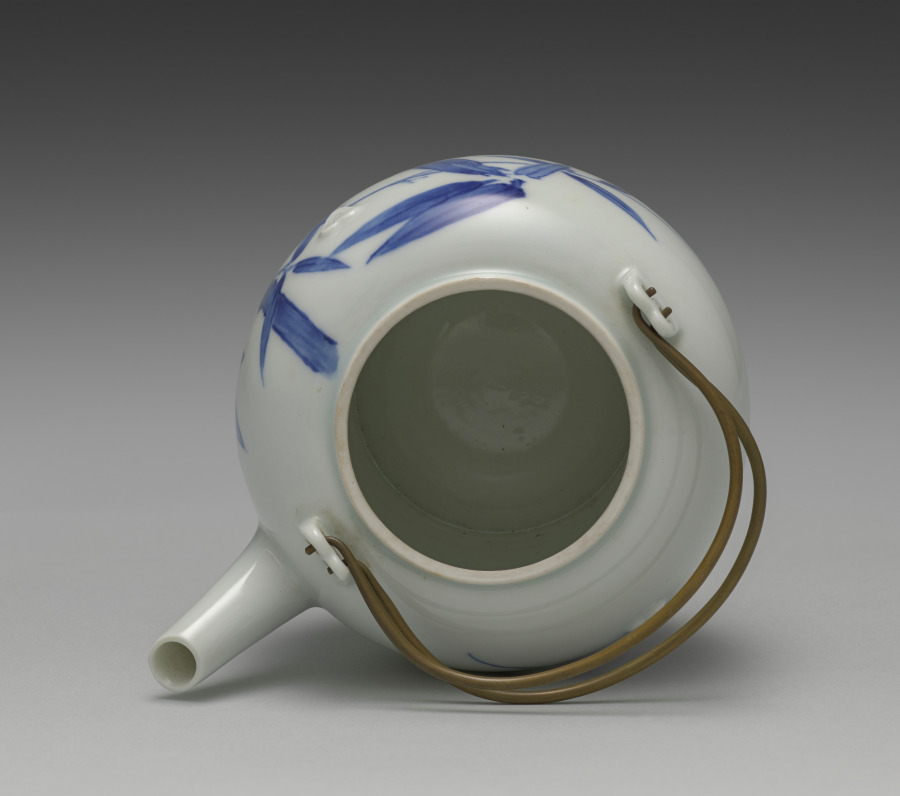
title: Teapot with Bamboo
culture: Japan, Taishō period (1912–26)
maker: Seifū Yohei IV (Japanese, 1872–1951)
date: 1914–46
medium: Porcelain with underglaze blue, molded decoration and metal handle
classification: Ceramic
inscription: 清風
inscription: 清風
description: This teapot has a well-balanced design of bamboo in underglaze blue and nyoi staff-head motifs applied to both sides at the shoulder.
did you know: There is a seal on the base of the teapot.